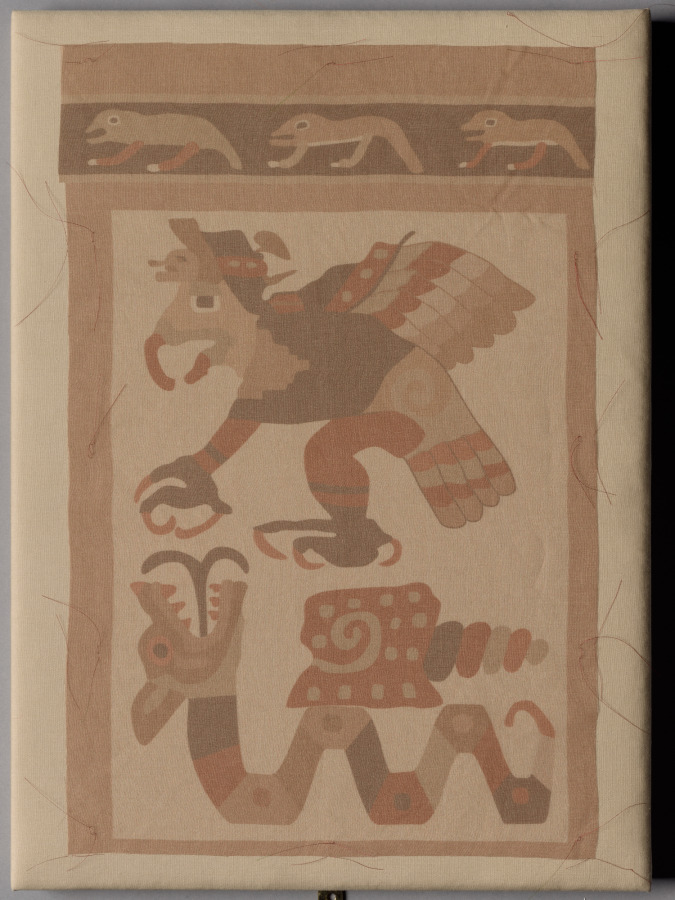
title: Textile Fragment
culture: Peru, Moche, north coast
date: c. 50–650 CE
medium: cotton and camelid fiber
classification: Textile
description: This fragment, one of several in the collection, is a rare survivor of catastrophic rains that destroyed much of the Moche textile legacy and may have helped to bring about the decline of Moche culture. It depicts a serpent and a snail beneath a hovering raptorial bird—perhaps a snail kite, a type of hawk named after its favored food. The size of the motifs implies that the original textile was large; a mantle (a shawl-like garment) or a hanging are among the possibilities.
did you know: This fragment is a rare survivor of floods that destroyed much of the Moche textile record.